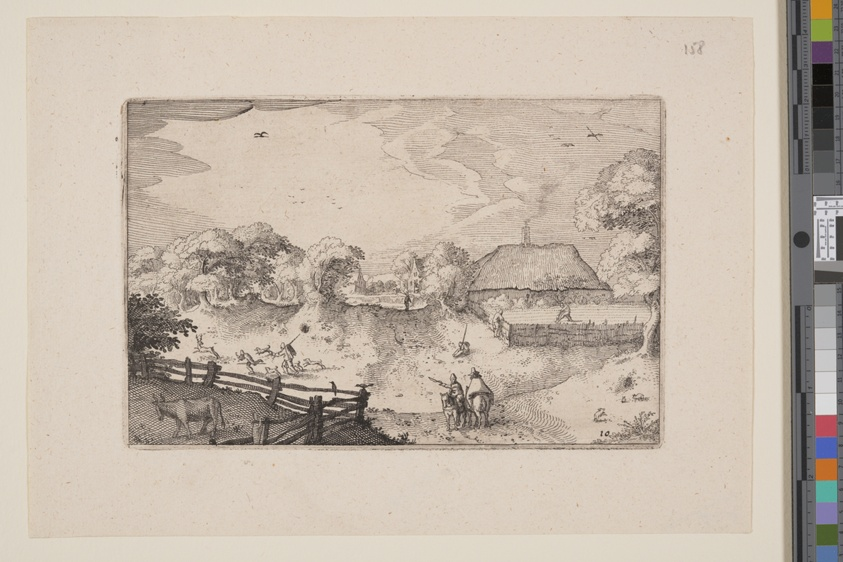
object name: Print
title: Road Near the Dunes, from Views in the Surroundings of Haarlem (Plaisante Plaetsen)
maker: Claes Jansz. Visscher (Netherlandish, c. 1550–c. 1612)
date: 1610/20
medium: Etching on ivory laid paper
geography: Netherlands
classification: print; paper; prints and drawing; etching